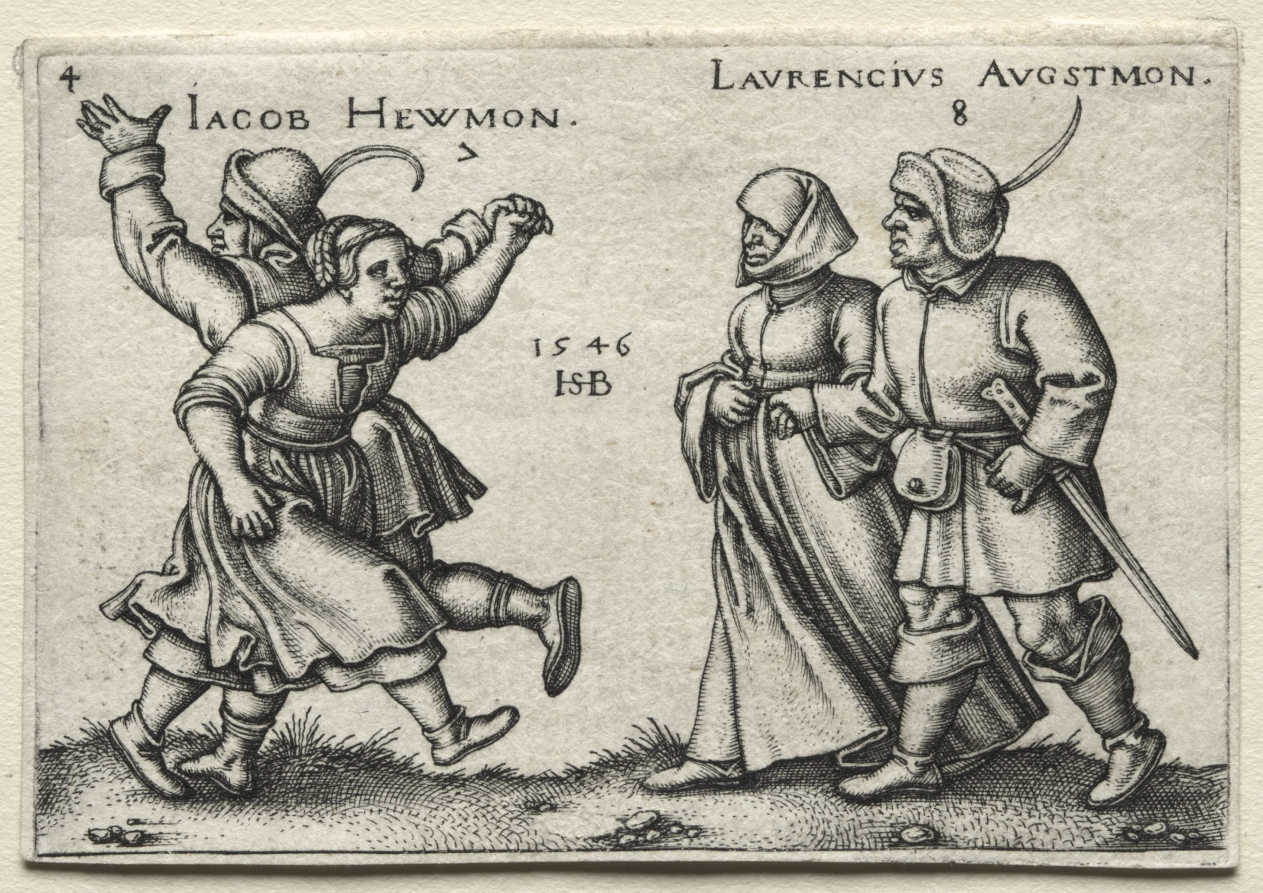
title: The Village Wedding: Jacob Hewmon / Lawrencius Augstmon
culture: Germany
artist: Hans Sebald Beham (German, 1500–1550)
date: 1546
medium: engraving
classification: Print